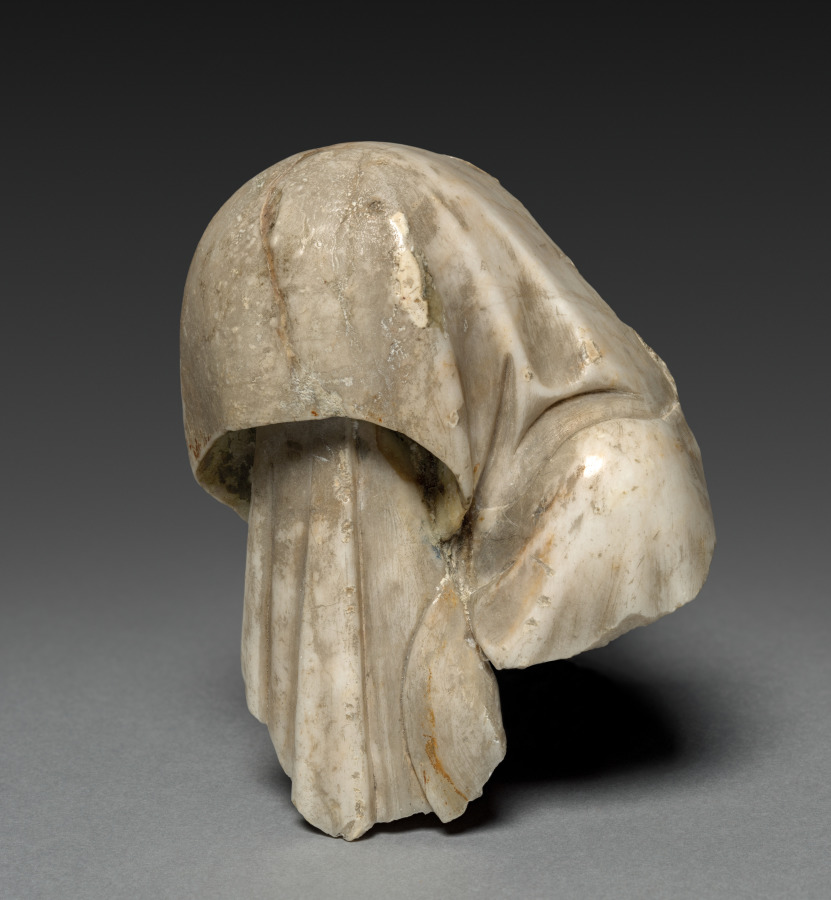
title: Head of a Mourner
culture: Spain, Poblet(?), 15th century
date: 1400s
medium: marble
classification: Sculpture